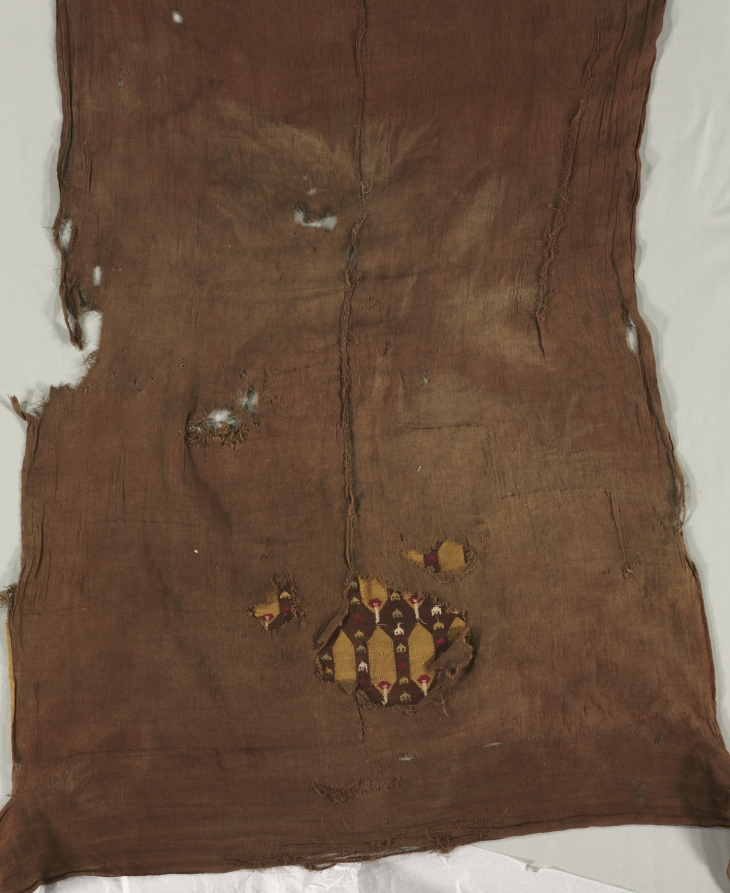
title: Loincloth with Feather(?) Motifs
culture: Peru, Central Andes, Chimú or Chimú-Inka, 11th-16th century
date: 1000–1532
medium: plain weave, tapestry weave; cotton, camelid fiber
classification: Textile